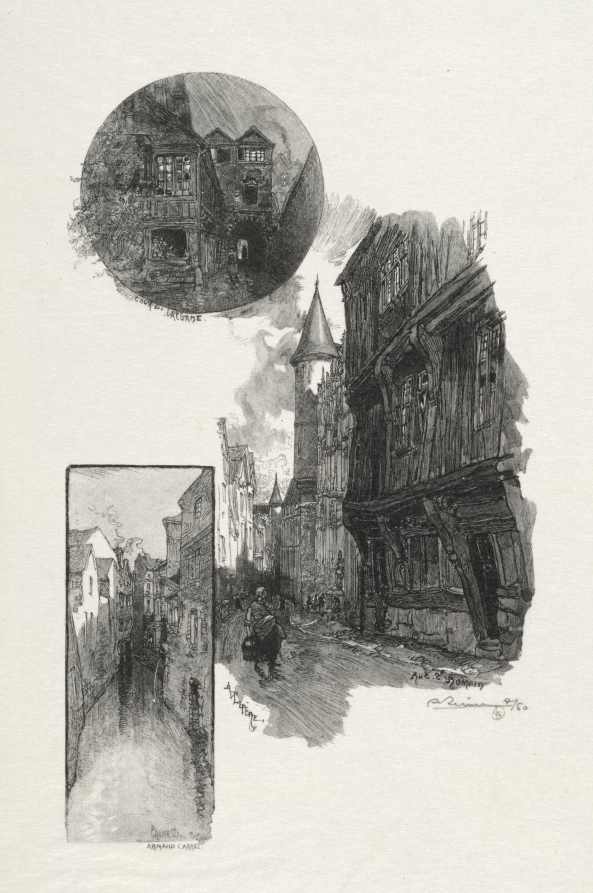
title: Rouen Illustré: Cour de L'Albane; Rue Saint Romain; L'aubette Rue Armand - Carrel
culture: France, 19th century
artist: Auguste Louis Lepère (French, 1849–1918)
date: 1896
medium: wood engraving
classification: Print